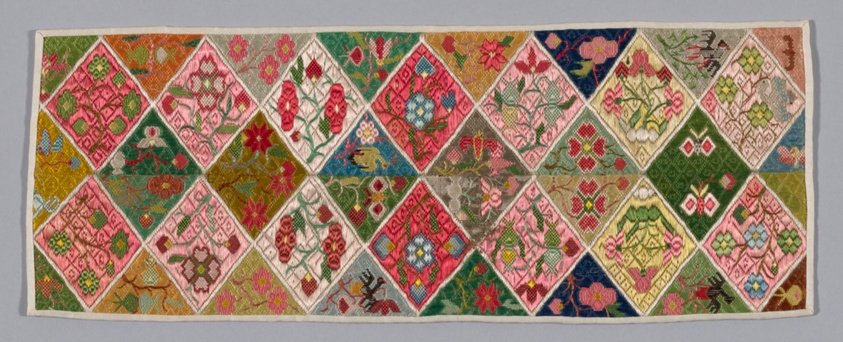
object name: Textile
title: Panel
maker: Han-Chinese (China)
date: Qing dynasty (1644–1911), 1875/1900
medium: Forty-four pairs and eight odd pieces of embroidered sleeve, ankle bands, etc. on gauze.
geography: China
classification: embroidery; textile